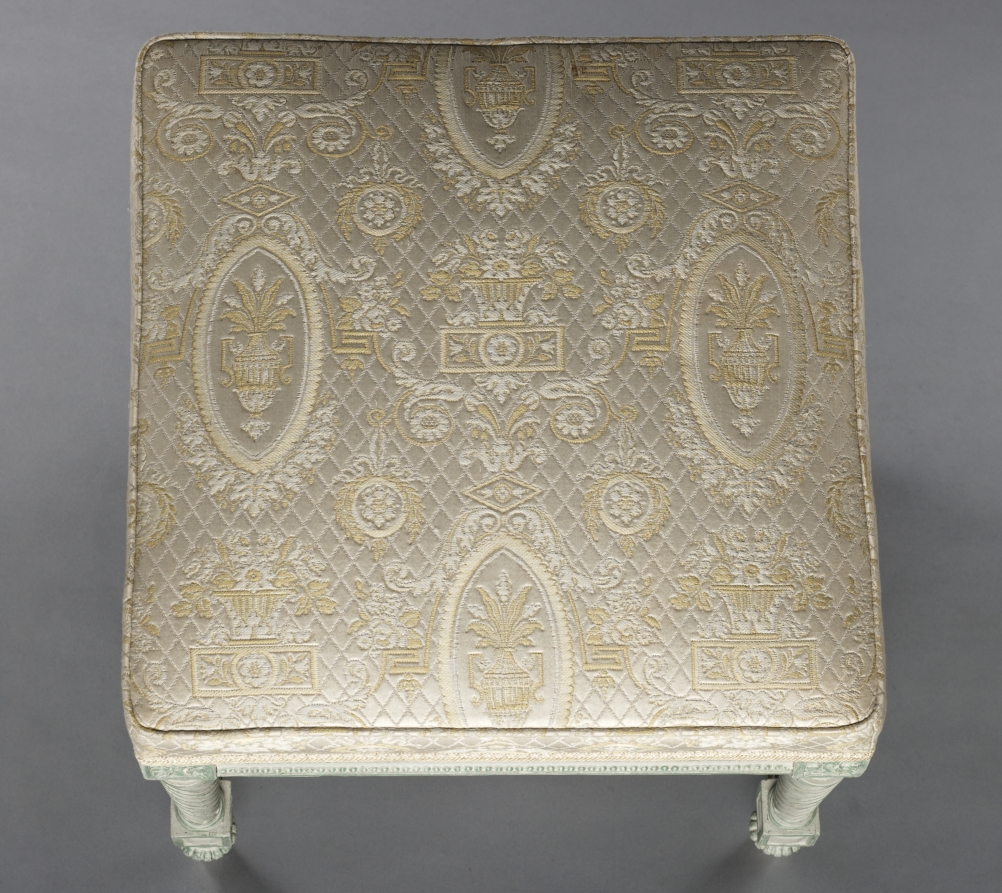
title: Stools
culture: France, Paris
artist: François-Honoré-Georges Jacob (French, 1770–1841)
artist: Georges Jacob (French, 1739–1814)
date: 1805–1813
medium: painted walnut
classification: Furniture and woodwork